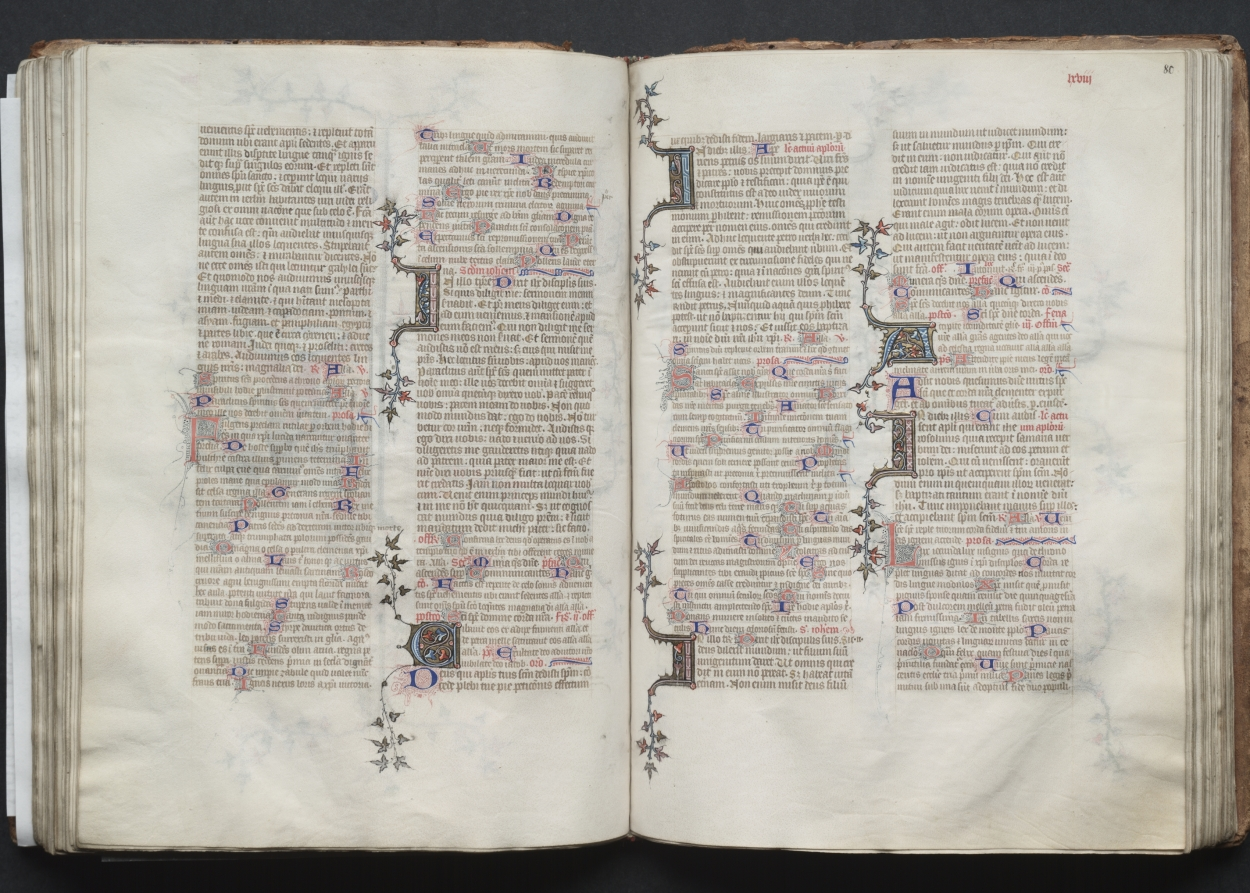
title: The Gotha Missal: Fol. 80r, Text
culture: France, Paris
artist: Master of the Boqueteaux (French)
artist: and Workshop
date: c. 1375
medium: ink, tempera, and gold on vellum; blind-tooled leather binding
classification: Bound Volume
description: The style and quality of this manuscript's decoration is typical of deluxe Parisian books made for aristocratic or royal patrons. Most of the book's decoration appears to be the work of the Master of the Boqueteaux, an artist active at the court of King Charles V (died 1380). His style was apparently shared by a number of book illuminators working in and around Paris. It is very possible that the Gotha Missal belonged to Charles V, but is not provable because the manuscript has no royal portraits and lacks a colophon. Given the book's magnificent decoration, however, it would seem that it was produced for a Valois prince, if not for the king himself. The manuscript receives its name from the German dukes of Gotha, its later owners.